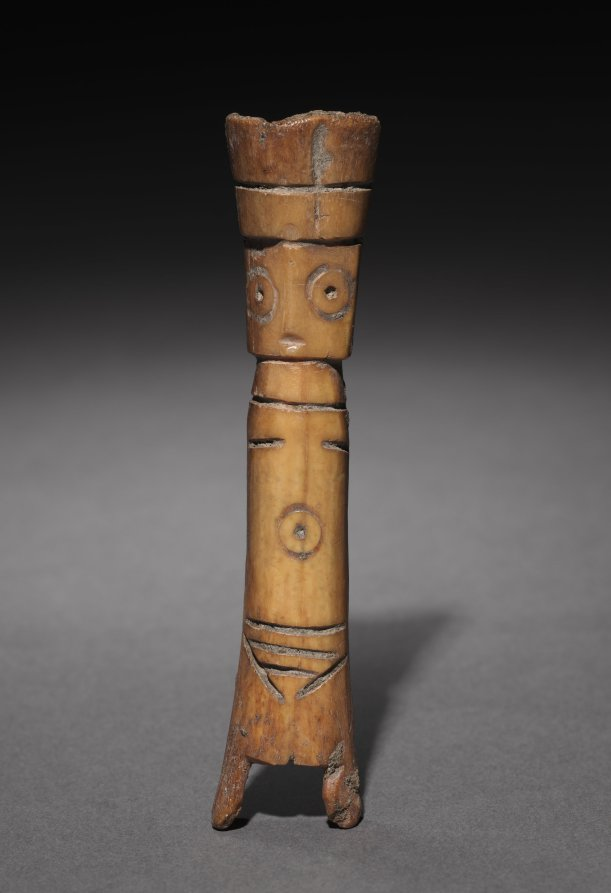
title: Amulet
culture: Parthian Empire (247 BCE–224 CE)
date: 1–200 CE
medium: carved bone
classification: Miscellaneous